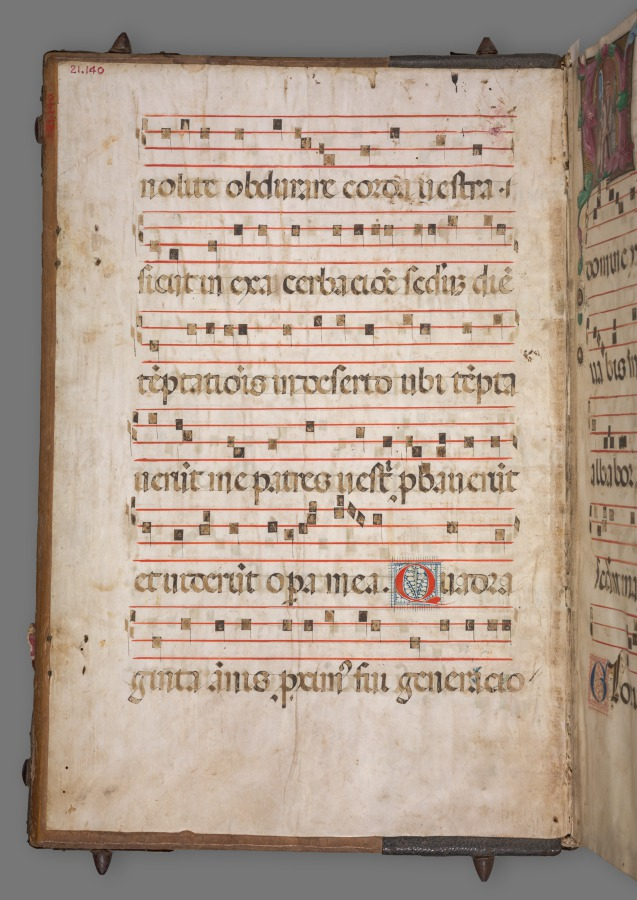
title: Gradual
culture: Italy, Verona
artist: circle of Girolamo dai Libri (Italian, 1474–1555)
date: c. 1520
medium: Ink, tempera, and gold on vellum; wood binding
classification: Manuscript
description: The liturgical book known simply as a “gradual” was the principal choir book used during the Mass. They were produced in multiple volumes, sometimes as many as 12, in order to cover the entire liturgical year. Every church required a set of graduals in addition to other liturgical books such as missals, antiphonaries, and gospel lectionaries. This volume appears to be the lone survivor from a larger set. Its illuminations were painted by an illuminator working in the circle of the much-esteemed and highly imitated painter Girolamo dai Libri of Verona, who was a prolific painter of altarpieces as well as illuminations for books.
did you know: Girolamo dai Libri was only 16 years old when he painted his first altarpiece.